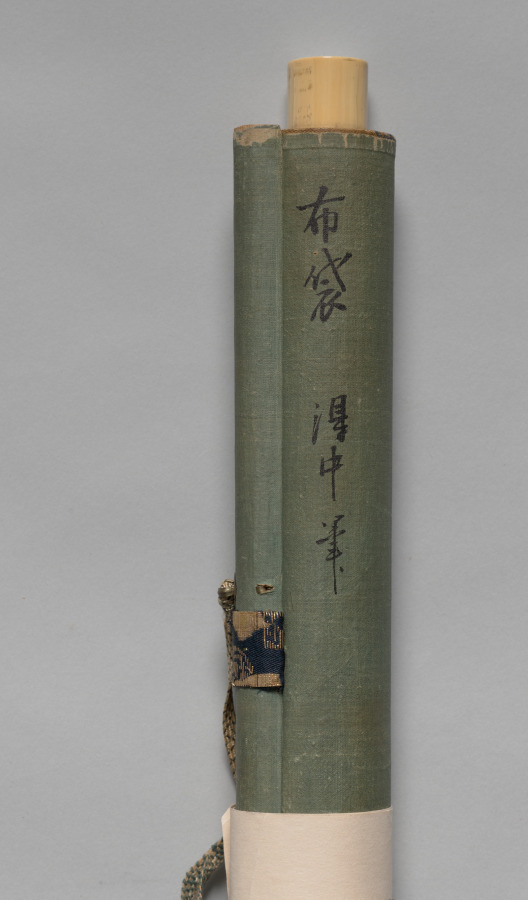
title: Hotei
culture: Japan, Muromachi period (1392–1573)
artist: Tokuchū (Japanese, late 1400s)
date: late 1400s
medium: hanging scroll; ink on paper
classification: Painting